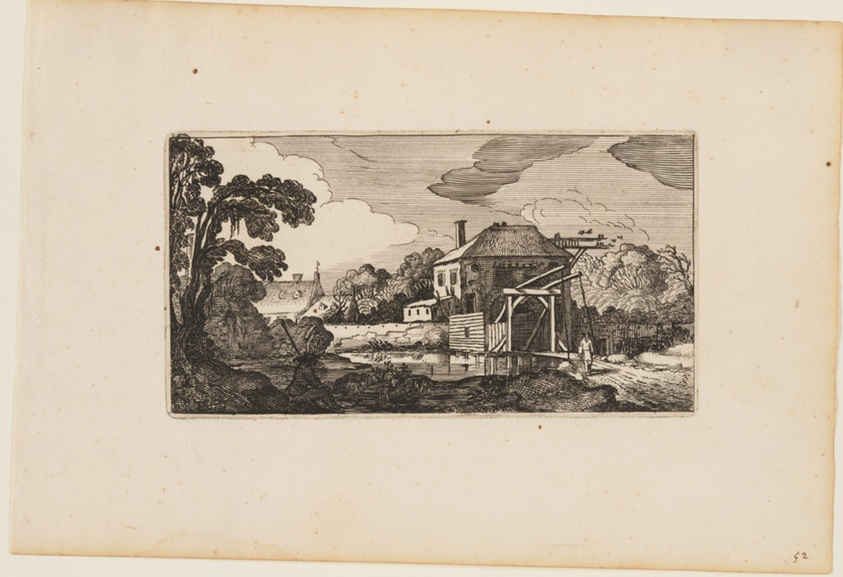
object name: Print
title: Pond before Wooden Bridge and a House, from Twelve landscapes with Figures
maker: After Gillis van Scheyndel; Dutch, 1595–1660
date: 1624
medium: Etching on ivory laid paper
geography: Netherlands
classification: etching; paper; print; prints and drawing